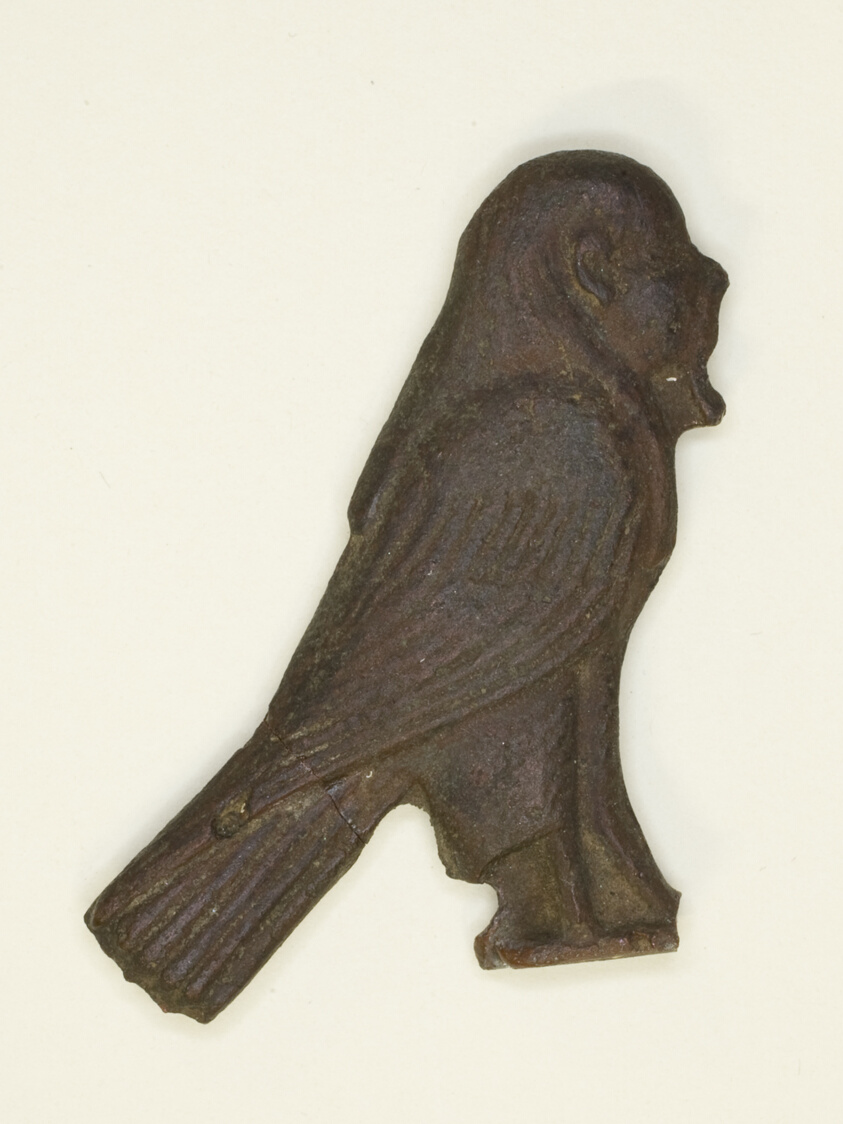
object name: Costume and Accessories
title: Amulet of the Soul as a Human-Headed Bird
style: twenty-fifth dynasty, third intermediate period, late period (egyptian)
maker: Egyptian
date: Late Period, Dynasty 25–30 (780–343 BCE)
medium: Glass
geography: Egypt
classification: amulet; glass; jewelry; ancient art; costume